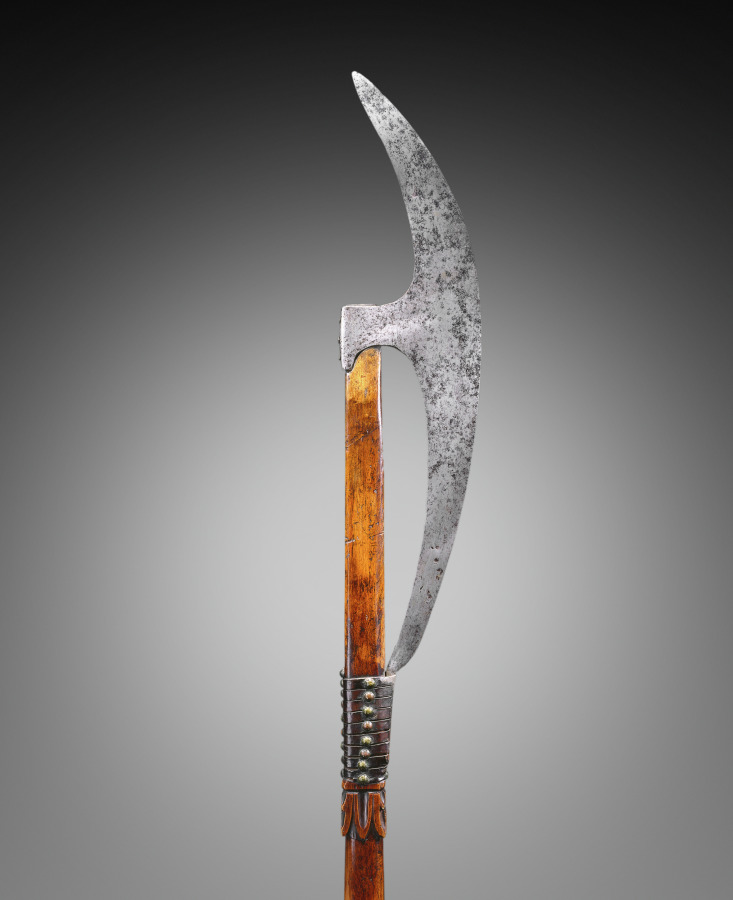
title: Bardiche (Pole Axe)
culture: Germany or Russia, 16th century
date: 1500s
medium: steel, leather, brass; wood haft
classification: Arms and Armor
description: A bardiche is a type of polearm that was used from the 1300s to the 1600s in Europe. Although similar to a halberd it does not have the hook. The shape of the blade can vary but the defining feature is that one end is fastened to the wooden shaft.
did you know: Hung high on the wall of the Armor Court, this weapon of war, standing almost six feet tall, was sure to intimidate any approaching soldier.